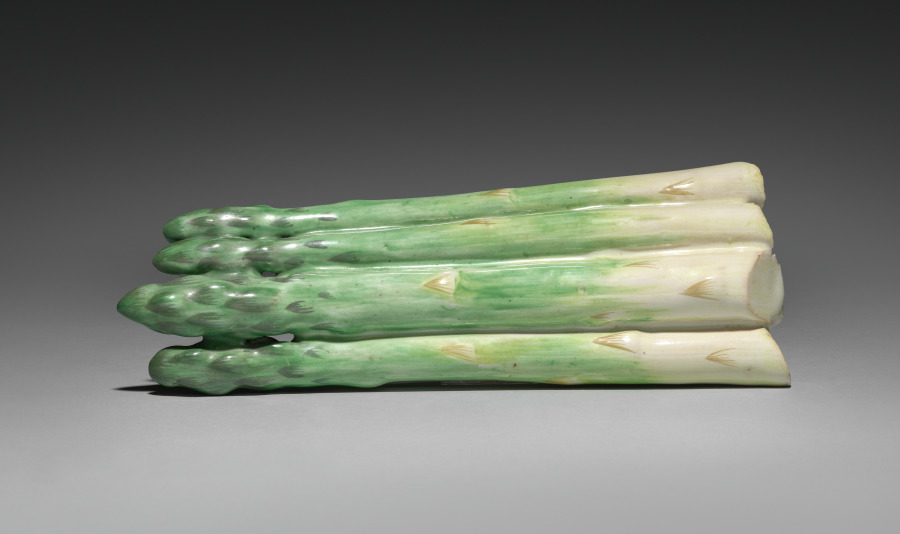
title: Box in the Form of Asparagus (lid)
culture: France, Sceaux(?), 18th century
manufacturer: possibly by Sceaux Factory (French, active 1748–66)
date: c. 1765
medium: tin-glazed earthenware (faience) with enamel decoration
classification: Ceramic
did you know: Placed upon the dinner table, this container's lid might be lifted to reveal steaming asparagus. Imagine a wealthy 18th-century dining room with flickering candles, whimsical sculptures, and dishes like this decorating the table.